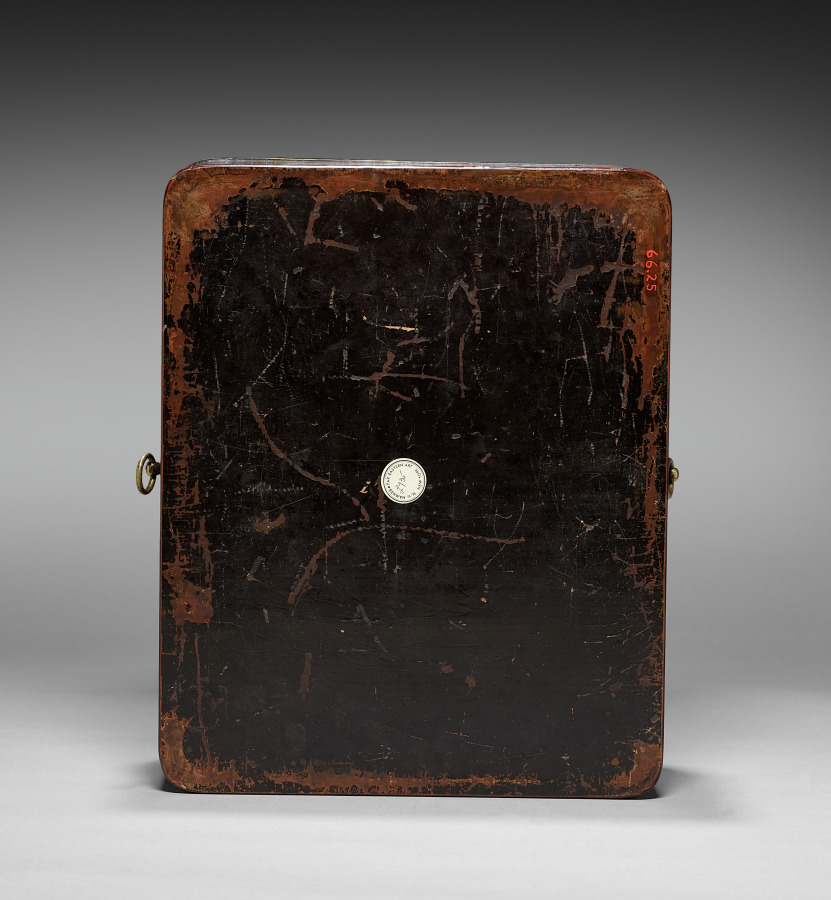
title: Cosmetic Box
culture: Japan, Momoyama period (1573–1615)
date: 1573–1615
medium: wood with lacquer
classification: Lacquer